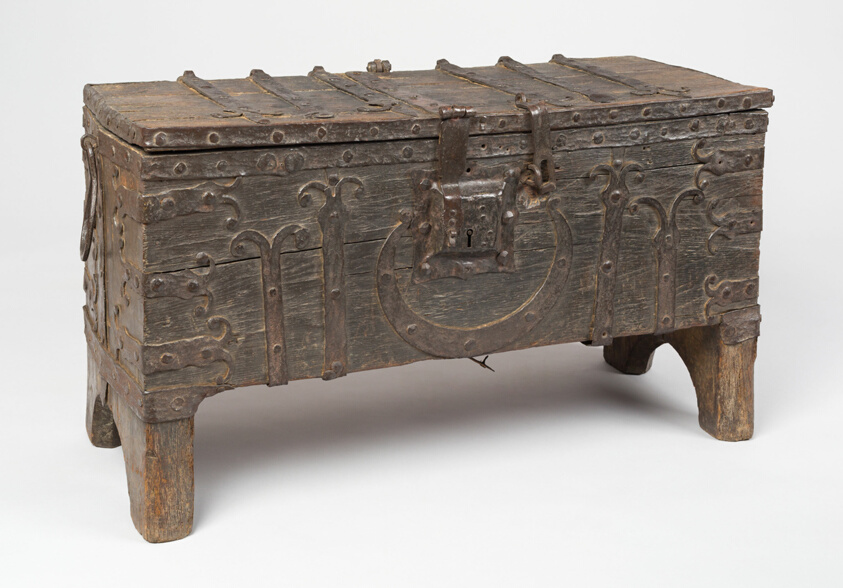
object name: Decorative Arts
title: Chest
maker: German; Alsace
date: 14th century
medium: Oak and iron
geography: Alsace-Lorraine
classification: case furniture; furniture; european decorative arts; decorative arts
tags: furniture